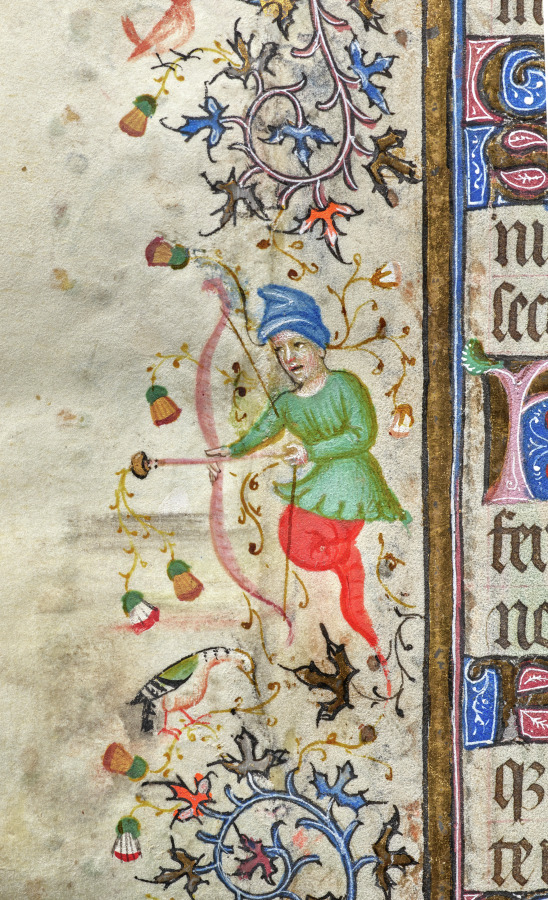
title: Hours of Charles the Noble, King of Navarre (1361-1425): fol. 173v, Text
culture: France, Paris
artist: Master of the Brussels Initials and Associates (French)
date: c. 1405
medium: ink, tempera, and gold on vellum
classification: Bound Volume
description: This precious volume was obviously highly prized by its owner, the French-born King of Navarre, who had his coat of arms painted on no less than twenty folios. Rather than directly commissioning this manuscript from a specific workshop, it seems that Charles the Noble acquired his book of hours -- perhaps ready-made for the luxury market -- while on a trip to Paris in 1404-05. A collaborative effort, six painting styles are evidenced within the pages of this codex, those of two Italians, two Frenchmen, and two Netherlanders. The painter who was responsible for the planning and decoration of the book, and who produced seventeen of the large miniatures, was a Bolognese artist known as the Master of the Brussels Initials. His principal assistant, responsible for most of the borders, was a Florentine who signed his name "Zecho" da Firenze on folio 208 verso.